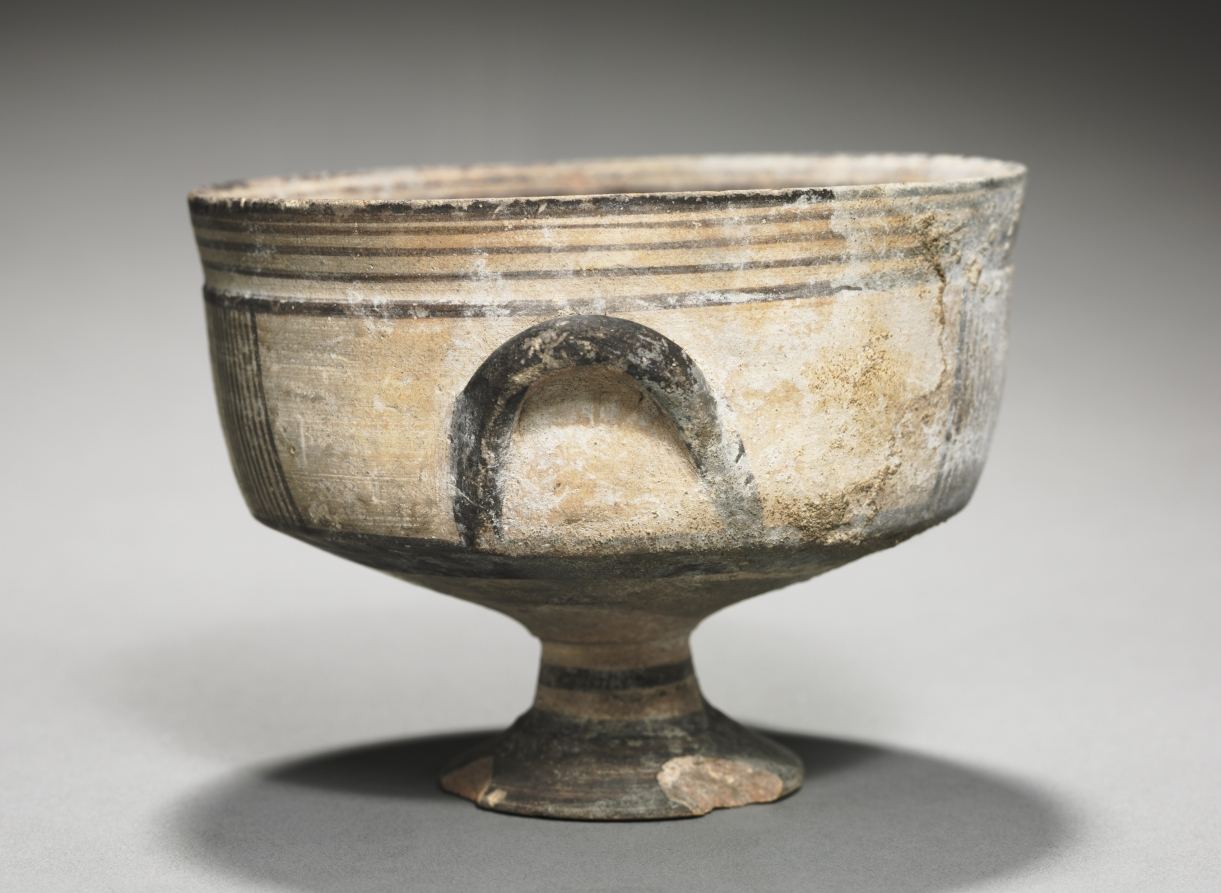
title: Footed Bowl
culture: Cyprus, Cypro-Geometric III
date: c. 850–750 BCE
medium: white painted ware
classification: Ceramic